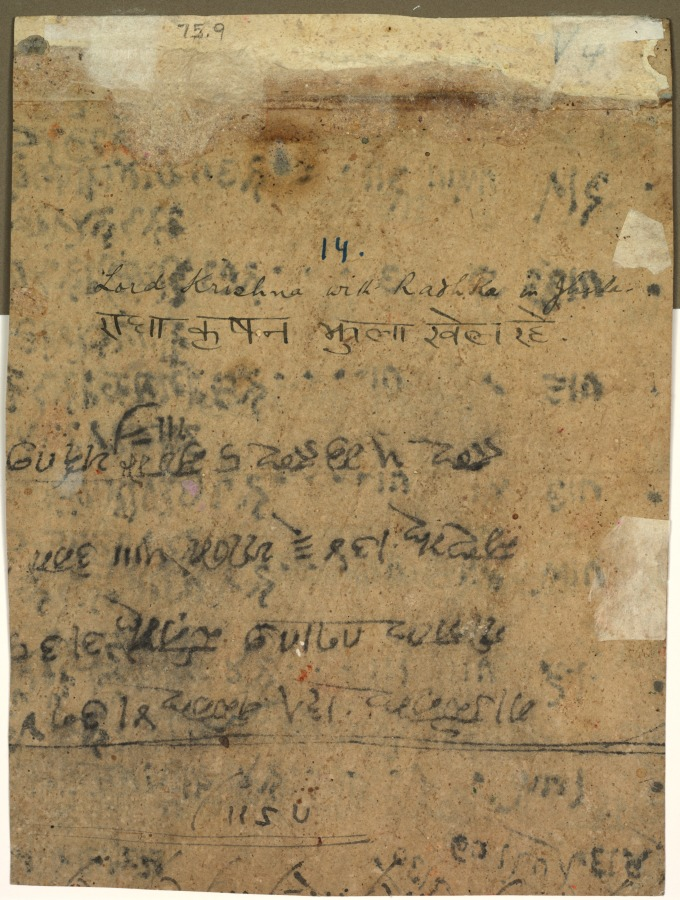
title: Hindola Raga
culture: Northern India, Pahari kingdoms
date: c. 1790–1800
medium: Gum tempera and gold on paper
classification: Painting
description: To celebrate the coming of spring, Krishna sits on a swing with his beloved Radha as their companions, the cowherd boys and milkmaids, play music, dance, admire the idyllic couple, and keep their swing gently in motion. In Sanskrit, hindola means swing, and this painting belonged to a set of ragas, which are paintings associated with a musical mode. Music played in the Hindola Raga elicits the fever of young love in springtime. Radha and Krishna represent the ideal of a young couple in love.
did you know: The word hindola means "swing" in Sanskrit.